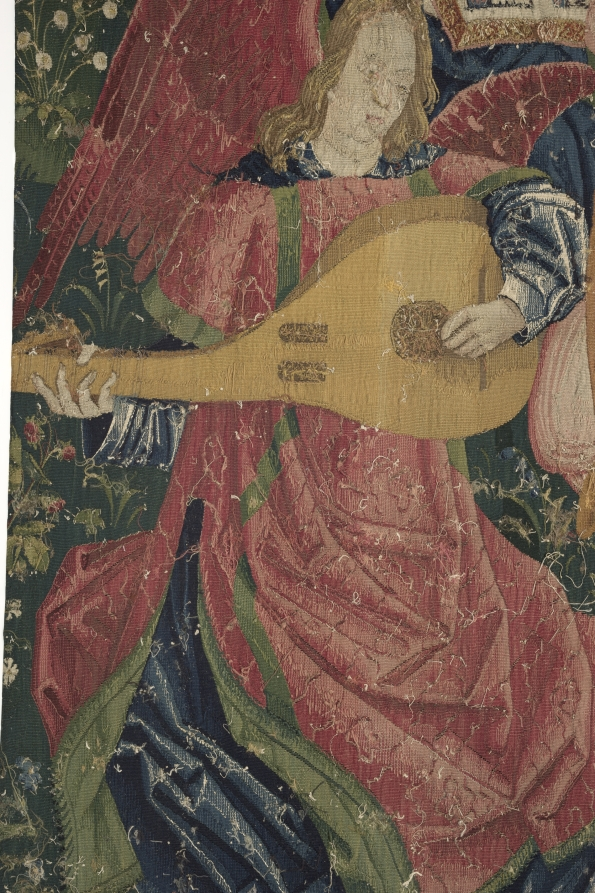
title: The Triumph of Eternity (from Chateau de Chaumont set)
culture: France, Lyon(?), early 16th century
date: 1512–15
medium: silk and wool; tapestry weave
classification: Tapestry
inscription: French verse in Gothic letters translates as follows: "Nothing triumphs by right authority, Unless it be conducted by Eternity. Nothing is permanent beneath the firmament, But above us triumphs Eternity."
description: The Triumph of Eternity is represented by the Coronation of the Virgin. Dressed in crimson velvet with an opulent brocaded velvet shawl, the Virgin is seated in the center as two angels hold a crown over her head. Five musical angels surround her playing an organ, recorder, straight cornetto, harp, and lute, while another sings from an open music book. The scenes in the set display a conservative style in which the figures are placed in shallow landscapes, thereby ignoring pictorial innovations for depicting space and mass. The verse in Old French at the top states: Nothing triumphing by due authority Remains permanent and durable. Nothing is permanent under the heavens, But above, eternity triumphs.